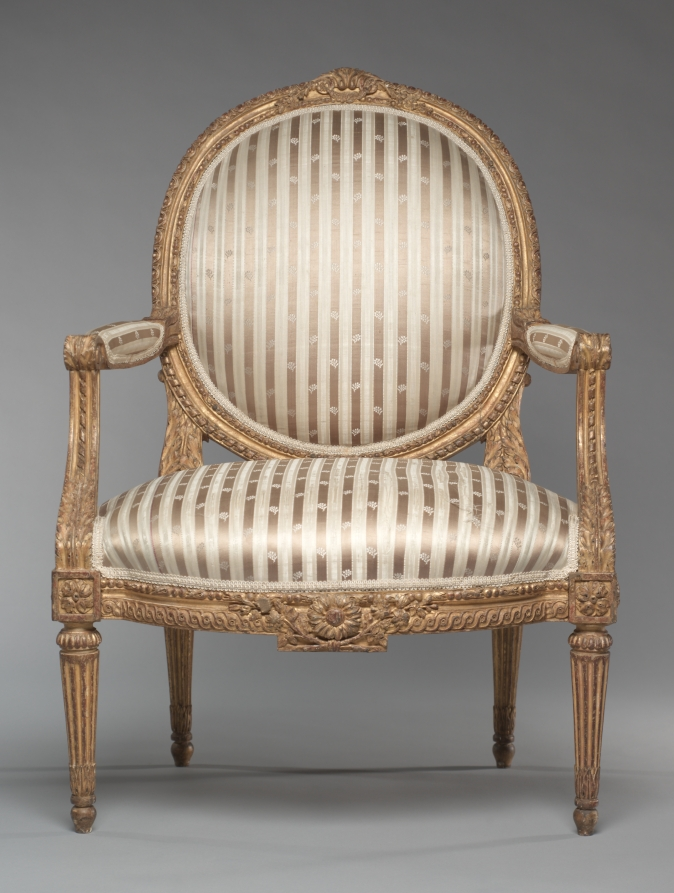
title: Armchair (Fauteuil) (1 of 2)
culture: France, 18th century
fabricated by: Jean-Baptiste II Tilliard (French, 1797)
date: c. 1765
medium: carved and gilded wood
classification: Furniture and woodwork